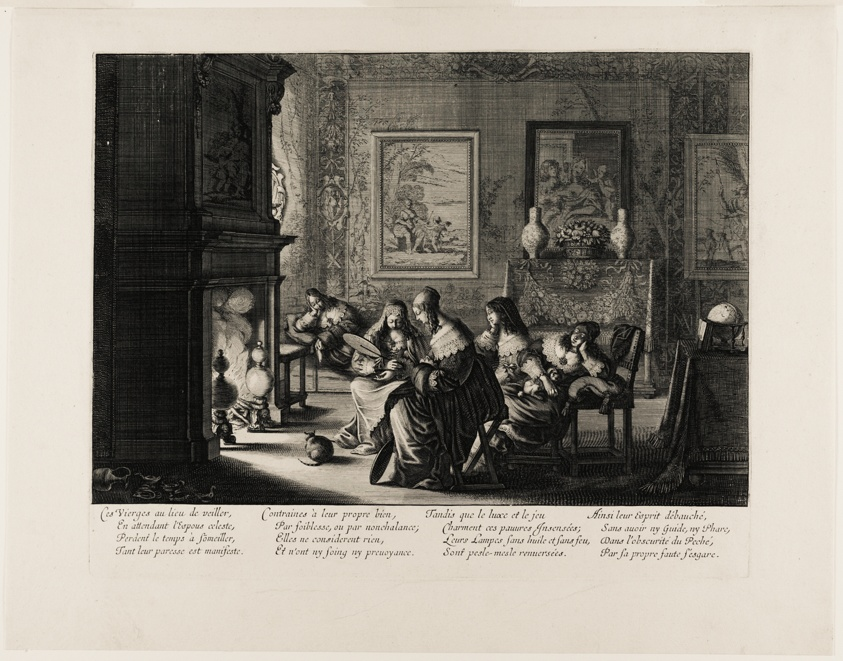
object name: Print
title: The Wise and Foolish Virgins, plate five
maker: Abraham Bosse (French, 1602-1676)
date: 1635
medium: Engraving and etching on ivory laid paper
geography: France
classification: etching; print; prints and drawing